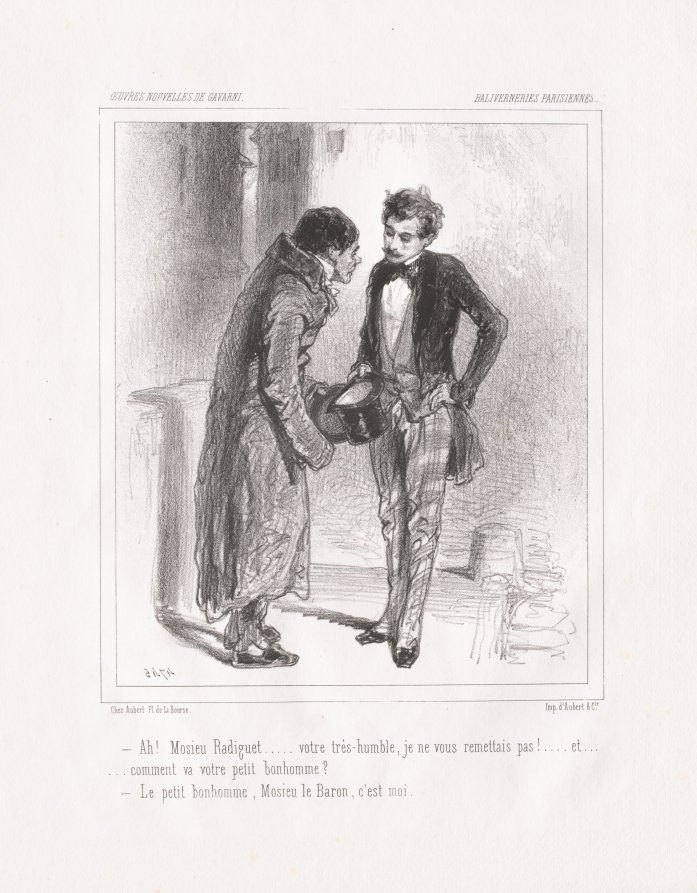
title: Baliverneries Parisiennes: Ah! Monsieu Radiguet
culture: France, 19th century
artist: Paul Gavarni (French, 1804–1866)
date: 1847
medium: lithograph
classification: Print